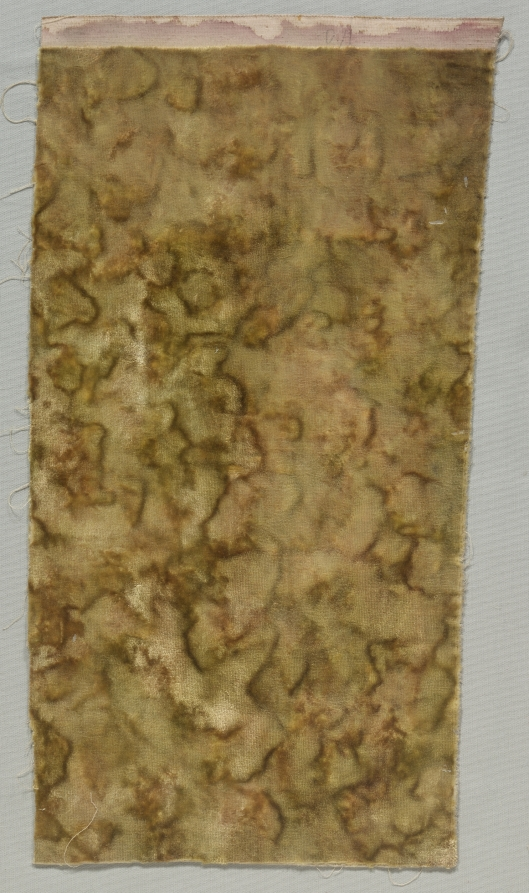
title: Stencilled Velvet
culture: America, New York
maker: Tiffany Studios (United States, New York, 1902–32)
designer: attributed to Dorothy Marshall Hornblower (American, 1886–1968)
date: c. 1902–10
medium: plain silk velvet stencilled with vegetable dyes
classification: Velvet